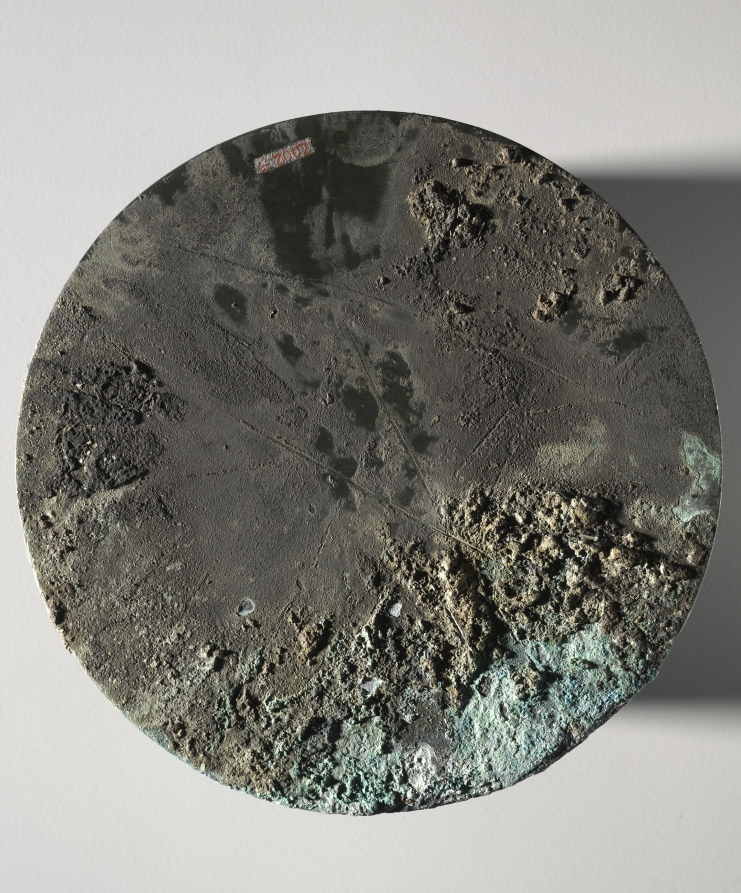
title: Mirror with Jade Disk Inset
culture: China, Eastern Zhou dynasty (770–256 BCE), Warring States period (475–221 BCE) to Western Han dynasty (206 BCE–9 CE)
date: 475 BCE–9 CE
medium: bronze with nephrite and turquoise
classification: Metalwork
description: Mirrors with a jade disk inset are perhaps the rarest of all known bronze mirrors in China. This object's conception was unquestionably aristocratic, and it was meticulously and exquisitely crafted. Aided by the skillful carving of its surface, the nephrite here exhibits a subtle luminosity. The disk features within the inner circle a pair of phoenixes and in the outer ring a set of four oxen masks having extended and interlocking horns-motifs often seen in jades of the late Warring States period and early Western Han dynasty. Consequently, this mirror has been dated to that span of time.